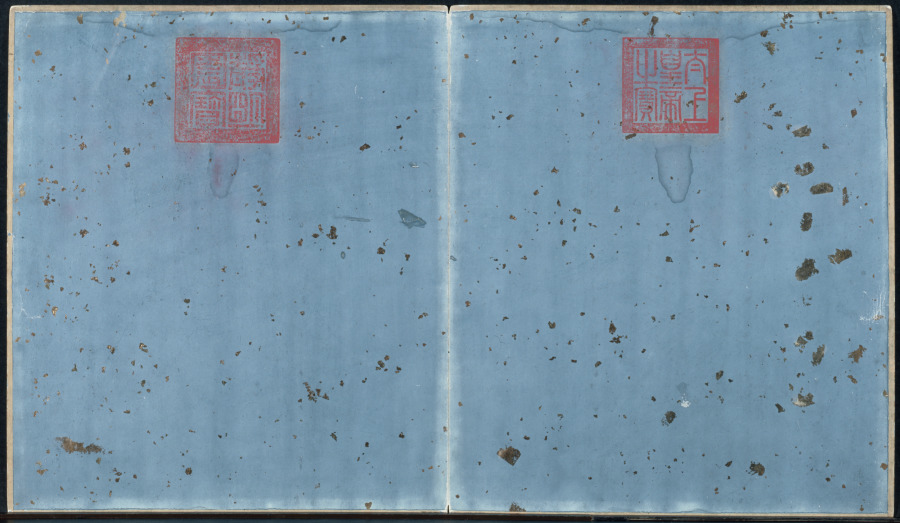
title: Battle Scenes of the Quelling of Rebellions in the Western Regions, with Imperial Poems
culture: China, Qing dynasty (1644–1911), Qianlong reign (1736–95)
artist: Giuseppe Castiglione (Italian, 1688–1766)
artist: Jean Damascene Sallusti (Italian, d. 1781)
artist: Jean Denis Attiret (French, 1702–1768)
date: c. 1765–74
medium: Etchings, mounted in album form, 16 leaves plus two additional leaves of inscriptions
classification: Print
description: This set of etchings was commissioned by Emperor Qianlong to record in pictorial terms the courage of his generals and soldiers in quelling the rebellions in the Western Regions. Qianlong added his own poem to each of the etchings, indicating his appreciation and pride in this demonstration of military might. "Western Regions" refers to the present-day Xingjiang province, often described in Western writing as "Central Asia."